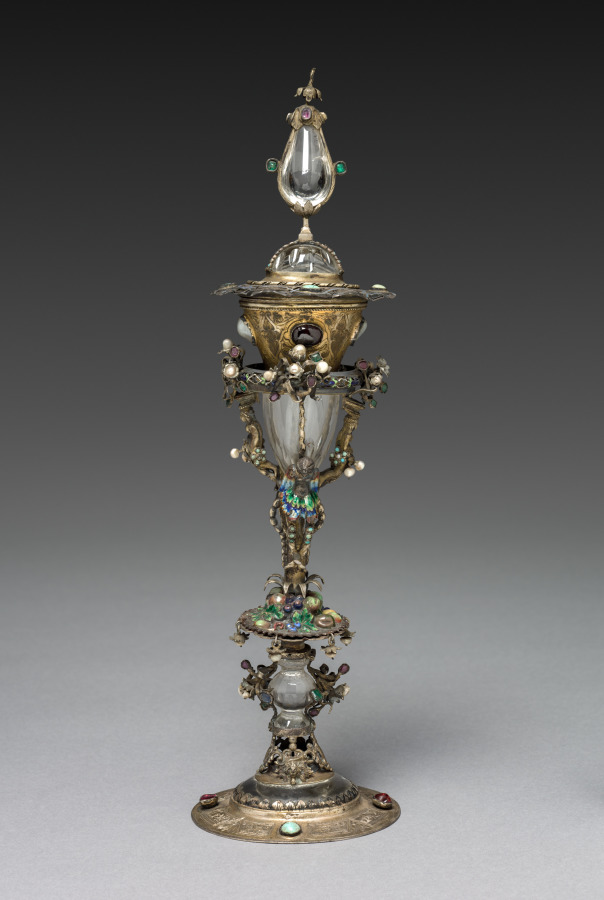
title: Blood Reliquary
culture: Italy (?), 16th century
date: 1500s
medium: gilt silver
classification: Metalwork